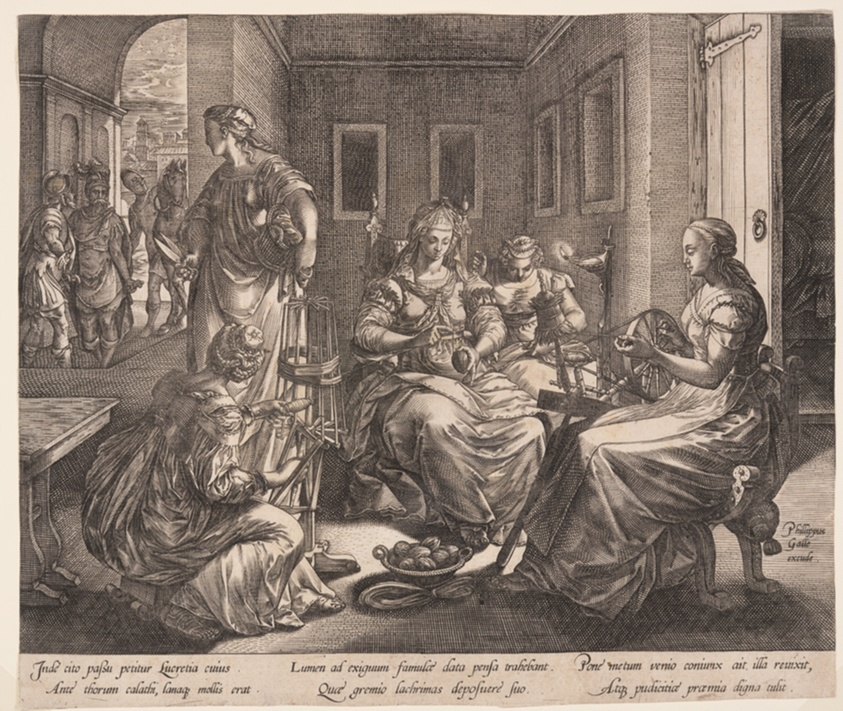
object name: Print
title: Lucretia and her Women Spinning, from The Story of Lucretia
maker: Hendrick Goltzius (Dutch, 1558–1617)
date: 1578–79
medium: Engraving on laid paper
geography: Netherlands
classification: print; engraving; paper; prints and drawing